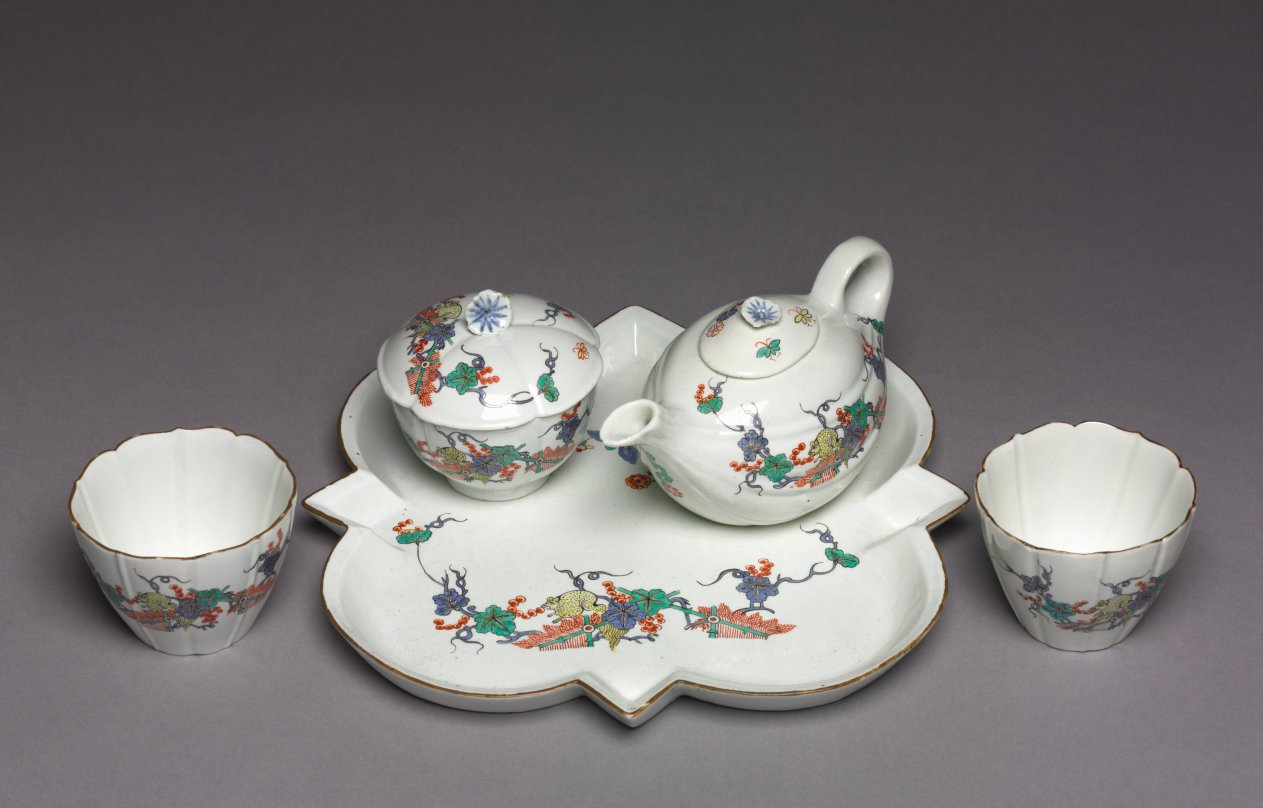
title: Tea Service (Déjeuner)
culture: France, Chantilly, 18th century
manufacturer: Chantilly Porcelain Factory (French)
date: c. 1730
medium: Tin-glazed soft-paste porcelain with enamel decoration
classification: Ceramic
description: This tea service, composed of a teapot, a sugar bowl, two cups, and a tray, is decorated with brightly colored polychrome floral motifs on a milky-white background typical of the Japanese Kakiemon style. The body of the teapot recalls Chinese or Japanese gourd or melon forms while the tray and cups pull inspiration from European silver models.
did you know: The use of knobs in the form of trumpet-shaped blossoms is characteristic of porcelain produced at the Chantilly factory.